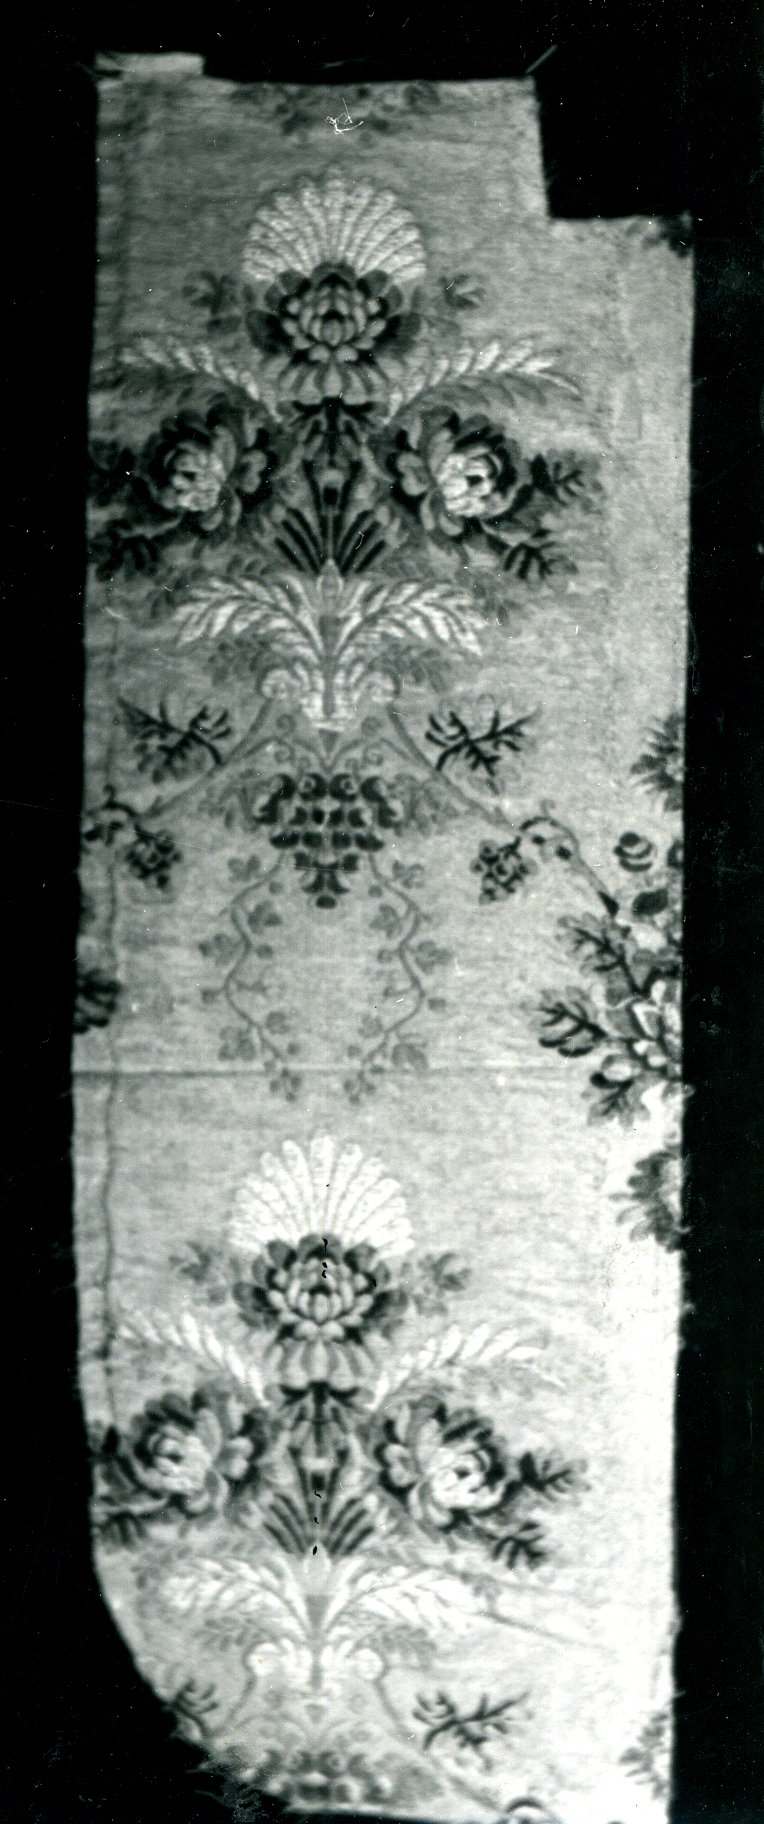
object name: Textile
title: Fragment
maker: France, for Russian trade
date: 19th century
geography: France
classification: textile; weaving